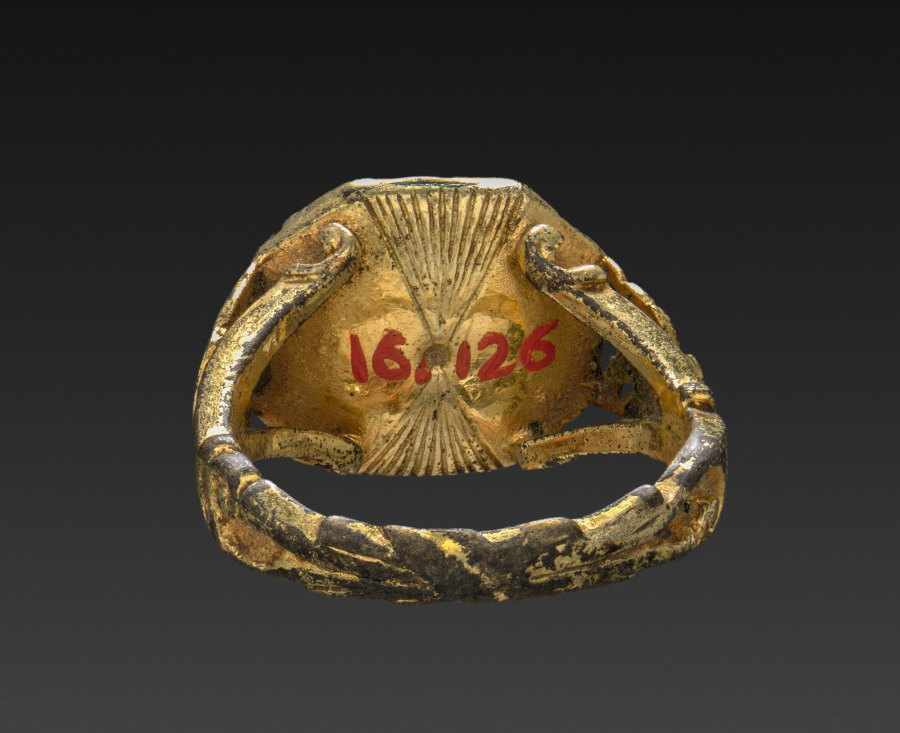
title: Seal Ring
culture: Germany, 18th century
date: 1700s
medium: gilded metal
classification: Jewelry